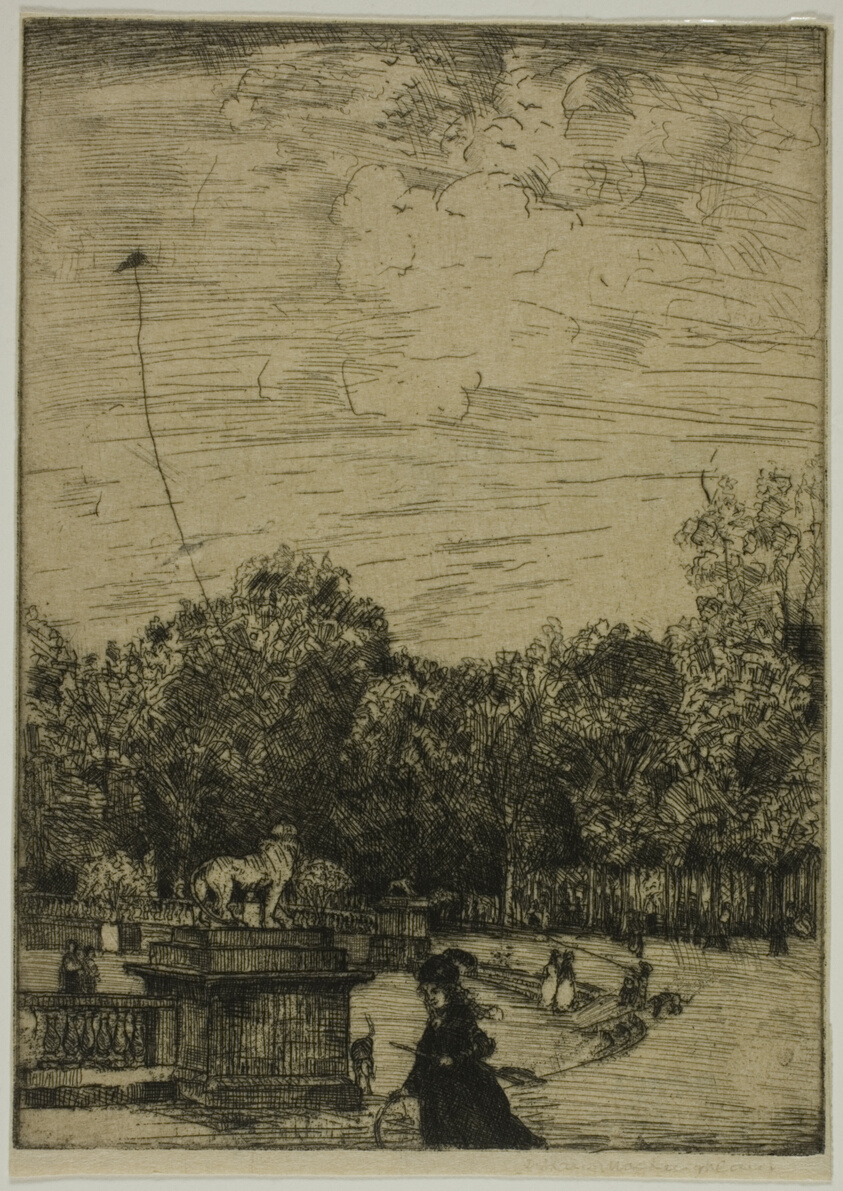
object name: Print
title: The Kite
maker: Donald Shaw MacLaughlan (American, born Canada, 1876-1938)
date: 1900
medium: Etching in black on cream laid paper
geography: United States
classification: etching; print; prints and drawing